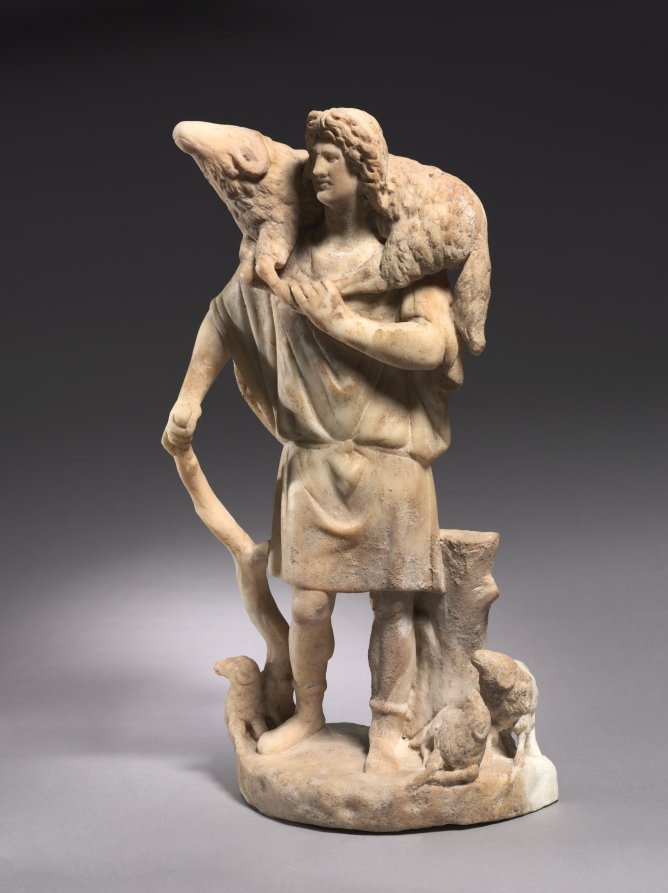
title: The Good Shepherd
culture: Anatolia, late Roman-early Christian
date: 280–90 CE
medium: marble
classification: Sculpture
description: Images of a youthful shepherd standing among his flock and carrying a sheep over his shoulders were popular with Romans of traditional faith as well as Christians living in the Late Roman Empire. Painted on the walls or the ceiling of a burial chamber or carved on a marble sarcophagus, this image might simply invoke the deceased’s hope for a peaceful afterlife spent in a pastoral setting. For Christians, this traditional Roman image took on a more specific meaning. It could be understood to refer to the passage in the Gospel according to John in which Christ said of himself: "I am the good shepherd. The good shepherd lays down his life for the sheep." (John 10:11). Allegedly found together with the Jonah statuettes, it is indeed likely that this figure represents Christ as the Good Shepherd.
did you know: This youthful shepherd appears serene while bearing a large sheep on his broad shoulders. He looks untaxed by this effort and his calm presence seems to put the small sheep at ease, as they frolic at his feet. Since this sculpture was found together with the four Jonah statuettes, it is likely this figure depicts Christ as the Good Shepherd.